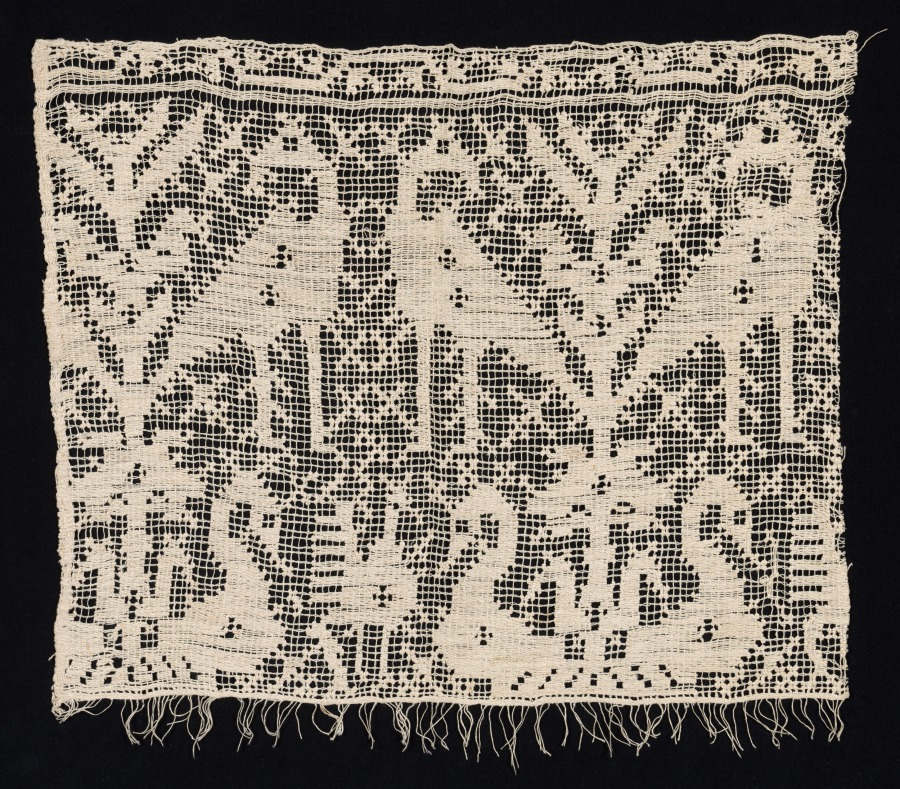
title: Fragment of a Border with Standing and Seated Birds Amidst Vegetation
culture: Italy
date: 1500s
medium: Bleached linen (est.): needle lace, burato (twined ground and darned in one direction)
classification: Lace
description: Three distinct bird species appear in this fragment distinguished through their body, neck, and feather shapes. In the period this lace was created, there was growing interest in the scientific study of birds, called ornithology. Ornithological books and prints depicted accurate records of birds, which deviated from previous fanciful portrayals.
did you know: The word lace derives from the Latin laqueus, meaning noose.